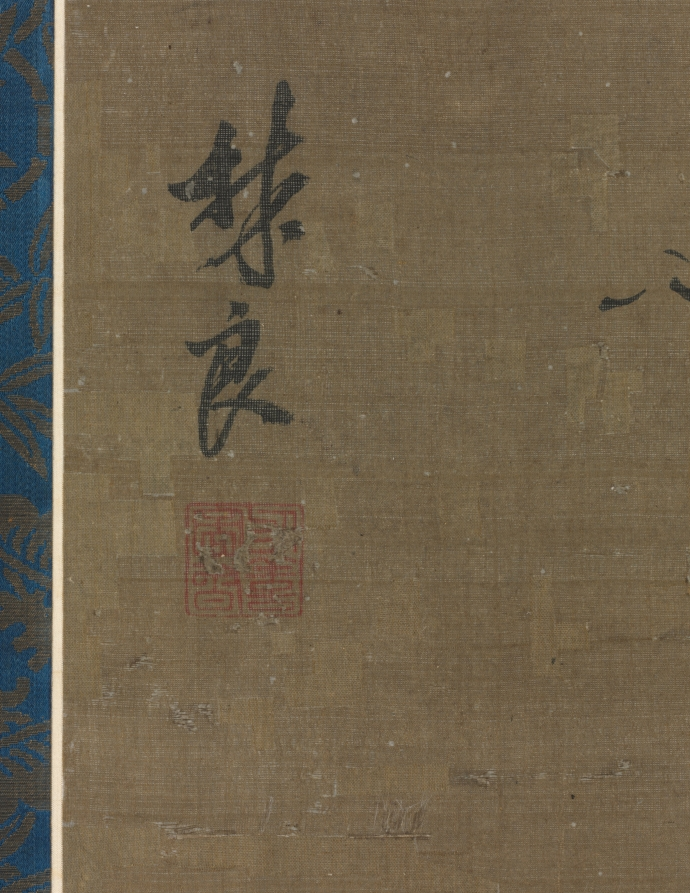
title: A Pair of Peafowl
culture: China, Ming dynasty (1368–1644)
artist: Lin Liang (Chinese, 1416–1480)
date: late 1400s-early 1500s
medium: hanging scroll, ink on silk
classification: Painting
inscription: 林良. [印] 以善圖書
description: The peacock, identified by the flamboyant tail, is paired with a female peahen to its right. In lowering her head, the hen seems to show respect to the male peacock. With his articulate brushstrokes and strong contrasting tones, Lin Liang’s representation in black ink appears as vivid as Yin Hong’s colorful peacock (1974.31). The painter skillfully uses wet and dry ink as well as broad and thin washes to represent the plumage of the bird. The surface of the rocks, depicted in powerful sweeping strokes, recalls the landscape painting style of the Zhe School, which specialized in expressive brushwork.